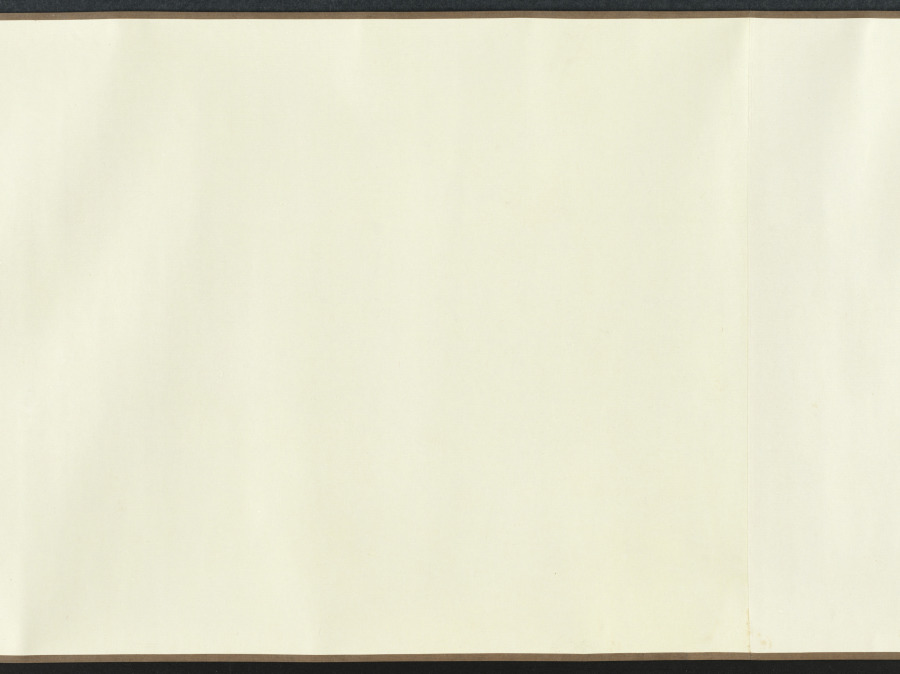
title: Ink Flowers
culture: China, Yuan dynasty (1271-1368)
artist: Zhao Zhong (Chinese, second half of the 1300s)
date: 1361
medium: Handscroll; ink on paper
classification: Painting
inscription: 寶帶同心結，香羅合歡扇。/ 繡作錦鴛鴦，雙雙為君獻。/ 薔薇露灑熏籠衣，馨香奉君君勿違。 原初并題。 [印] 趙衷原初畫記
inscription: 翠袂素羅韈，玉臺黃金盃。浩歌渡弱水。天風卷海三山開，麻姑方平為招飲，蛟宮獻舞銀濤堆。 原初并題。 [印] 雲林清趣、[印] 趙衷原初畫記。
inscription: 右用湯叔雅慶元中所寫墨花法作此卷，又效李長吉體賦詩以題之。詩與畫雖未工，要皆出於古人之餘，譬猶欲成方圓而必求其規矩之用也，識者毋誚焉！至正辛丑八月望日，東吳野人趙衷原初謹識。 [印] 趙原初、[印] 傳世清玩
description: Zhao Zhong's flowers, each paired with a poem, echo the fine-style colored flowers of the academic tradition, but instead he used only ink. Fine lines define the contours of each plant, as well as the veins within each petal and leaf. Careful ink washes give subtle modeling to the forms. The combination of lily, narcissus, and peony is unusual as the three belong to no known seasonal or symbolic system popular in the fourteenth century. Zhao’s medical training may have influenced the selection. Powdered lilies, for example, were prescribed to dispel grief, while the bark of tree peony roots was used as a treatment for various blood disorders.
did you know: This handscroll is a very rare example of ink flowers in the linear baimiao style of the fourteenth century.